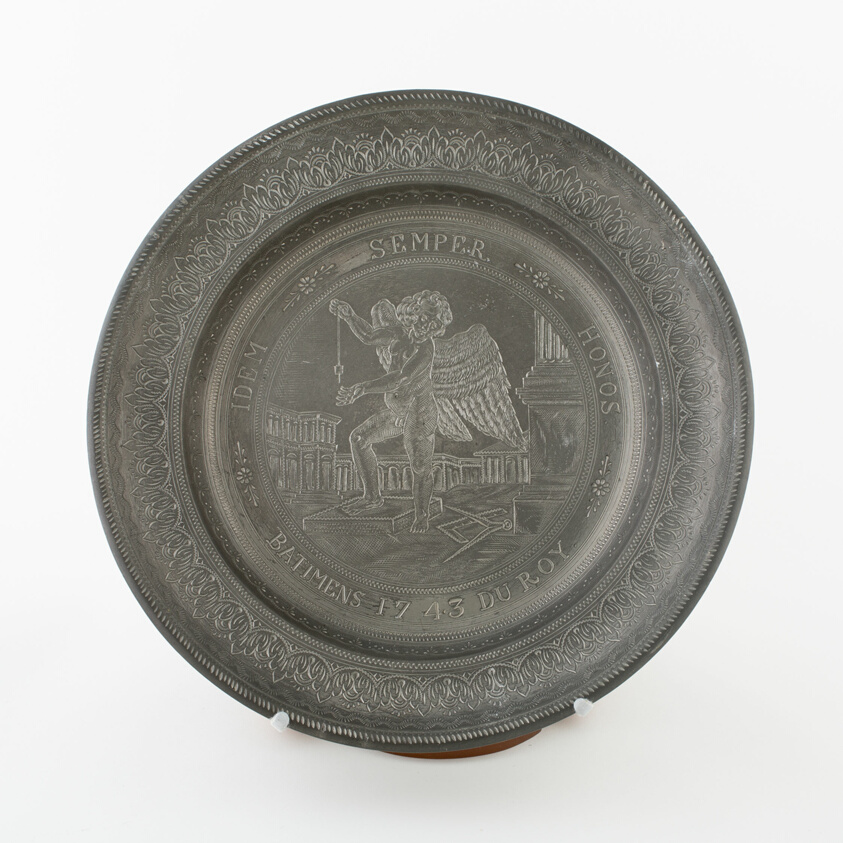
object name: Metalwork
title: Plate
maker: A. Karst (Austria)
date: 18th century; engraving probably 19th century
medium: Pewter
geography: Vienna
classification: plate (general, dish); pewter; dish (vessel); metalwork; european decorative arts